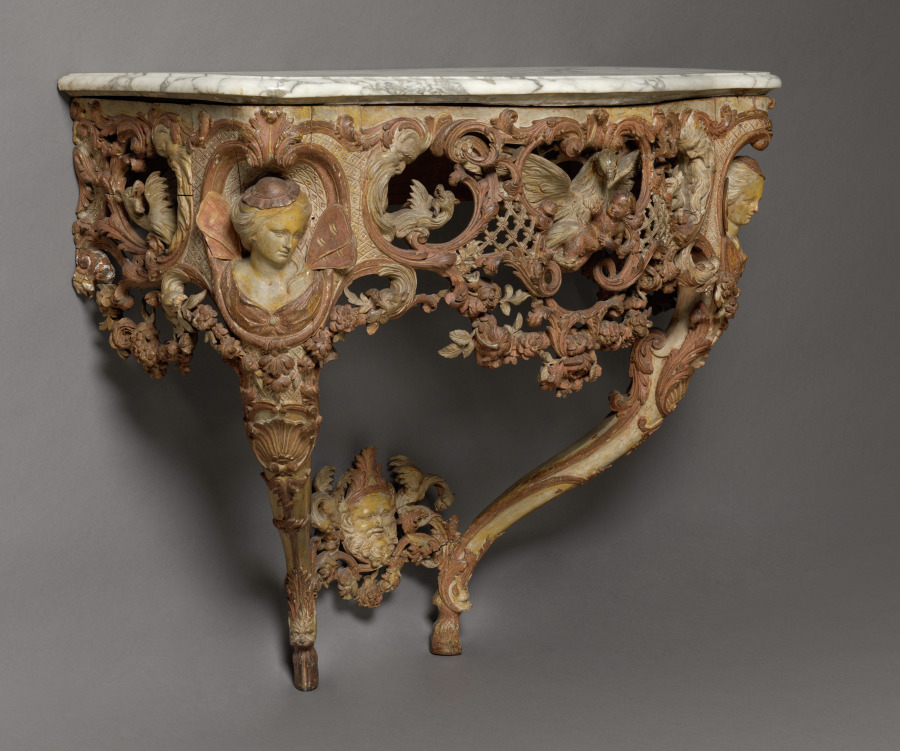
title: Console Table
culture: France, 18th century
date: c. 1720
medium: carved and painted wood, marble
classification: Furniture and woodwork